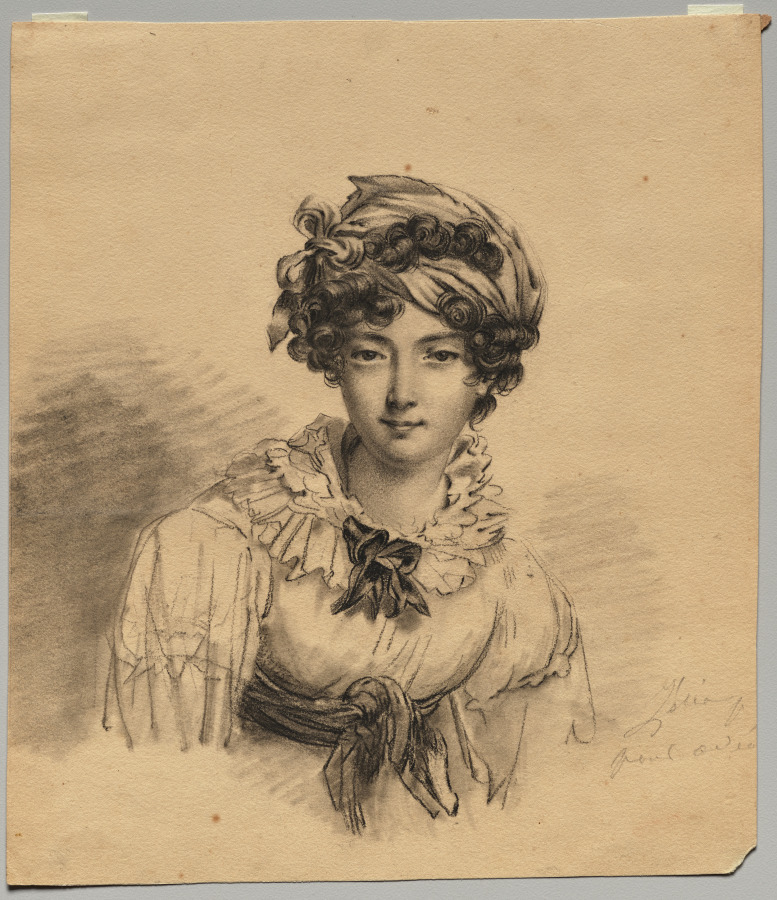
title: Portrait of the Artist's Daughter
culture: France, 19th century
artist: Martin Drölling (French, 1752–1817)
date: c. 1810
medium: black chalk on tan wove paper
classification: Drawing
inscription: at lower right, in graphite: “[illegible] / pour [illegible]”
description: Martin Drölling was an accomplished portraitist, known for intimate depictions that revealed their sitters’ personalities. This drawing shows his daughter, Louise Adéone (1797–before 1831) wearing a fashionable dress and hat. The young woman meets the artist’s gaze directly and confidently, her features delineated by a combination of smooth lines and soft shading in charcoal.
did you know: Martin Drölling’s daughter, this portrait’s sitter, went on to become an artist herself, painting under the name Madame Joubert.